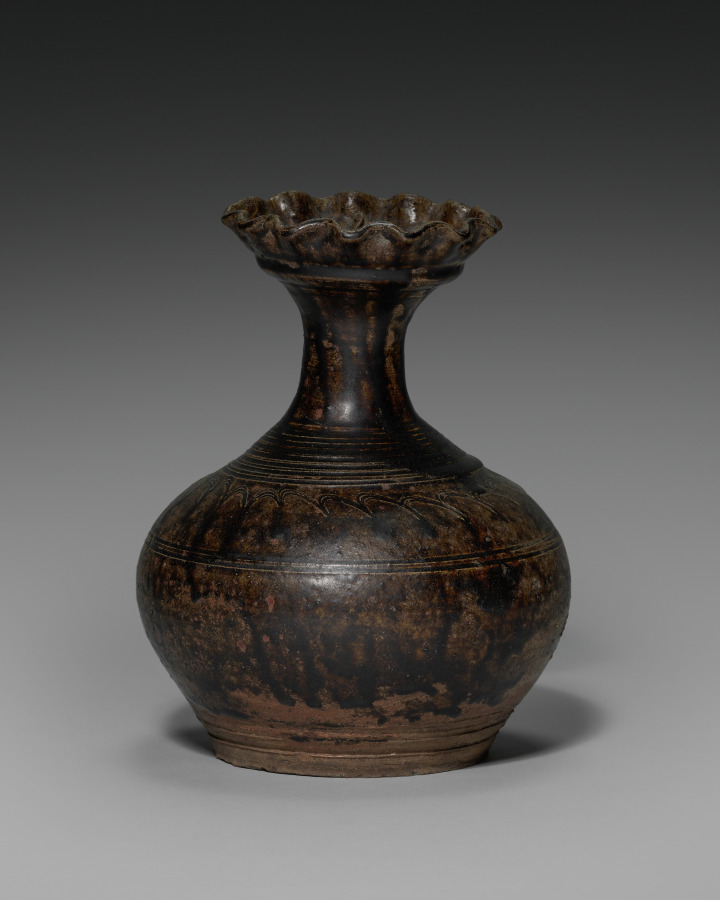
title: Khmer Vase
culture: Cambodia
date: 1100s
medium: earthenware with dark brown glaze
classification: Ceramic